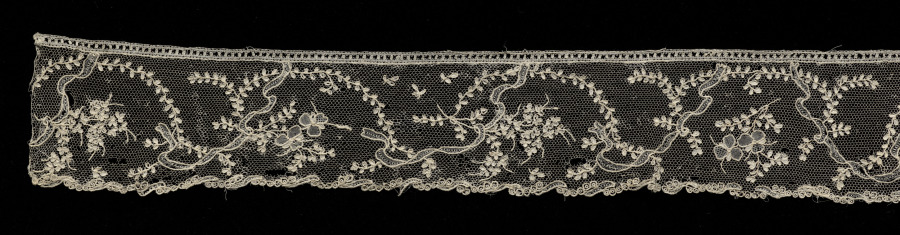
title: Lace Edging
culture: France, Alençon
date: 1740–60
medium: Needle lace (Point d'Alençon)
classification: Lace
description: With its flowing ribbon and garland pattern, this lace edging is from the late Louis 15th period or early Louis 16th period.